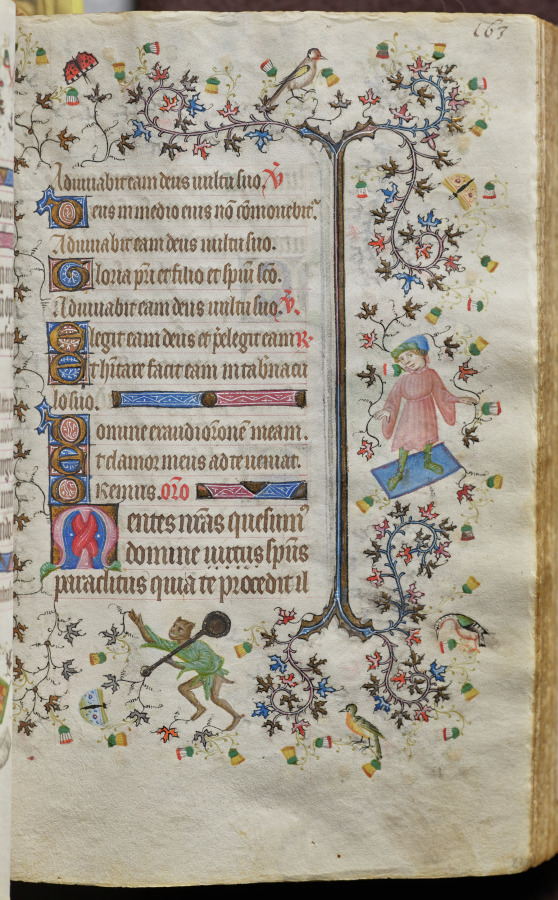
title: Hours of Charles the Noble, King of Navarre (1361-1425): fol. 82r, Text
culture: France, Paris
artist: Master of the Brussels Initials and Associates (French)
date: c. 1405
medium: ink, tempera, and gold on vellum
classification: Bound Volume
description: This precious volume was obviously highly prized by its owner, the French-born King of Navarre, who had his coat of arms painted on no less than twenty folios. Rather than directly commissioning this manuscript from a specific workshop, it seems that Charles the Noble acquired his book of hours -- perhaps ready-made for the luxury market -- while on a trip to Paris in 1404-05. A collaborative effort, six painting styles are evidenced within the pages of this codex, those of two Italians, two Frenchmen, and two Netherlanders. The painter who was responsible for the planning and decoration of the book, and who produced seventeen of the large miniatures, was a Bolognese artist known as the Master of the Brussels Initials. His principal assistant, responsible for most of the borders, was a Florentine who signed his name "Zecho" da Firenze on folio 208 verso.